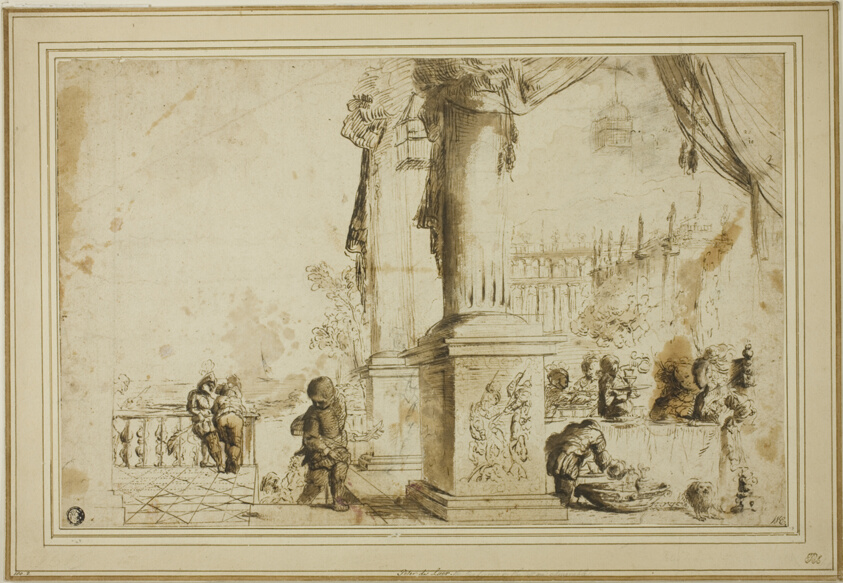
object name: Drawing and Watercolor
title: Banquet Scene on Terrace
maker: Unknown Artist; Italian, 17th century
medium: Pen and brown ink, with brush and brown wash and graphite, on cream laid paper, laid down on cream laid card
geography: Italy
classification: pen and ink drawings; drawings (visual works); prints and drawing